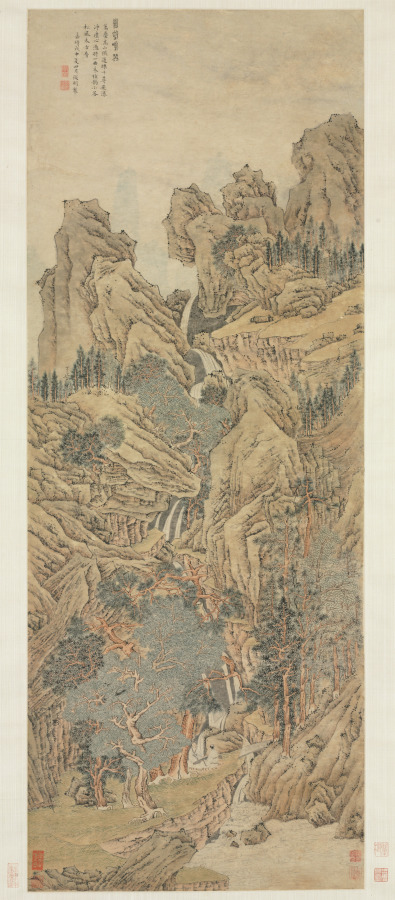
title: Playing the Qin in a Secluded Valley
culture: China, Ming dynasty (1368–1644)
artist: imitator of Wen Zhengming (Chinese, 1470–1559)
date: 1548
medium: hanging scroll; ink and light color on paper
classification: Painting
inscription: 幽壑鳴琴。 萬疊高山供道眼，千尋飛瀑淨塵心。 憑將一曲朱絃琴，小答松風太古音。 嘉慶戊申夏四月徵明製 [印] 徵明; 徵仲父印 [右下方] 悟言室印; 衡山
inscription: 4 additional seals: 3 of Cheng Qi 程琦 (1911–1988); 1 unidentified.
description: The poem inscribed in this painting reads: "Ten thousand layered lofty mountains are presented to the cultivated eye, A thousand feet of cascading falls cleanse the dusty heart. May the harmonies of my red-stringed tune Be the humble answer to the pine wind's ancient song." Different versions of this painting exist. Scholars have suggested that the solid renderings of the rock masses and the volumetric mountain configurations as seen here appear more characteristic of Lu Zhi 陸治 (1496–1576), Wen Zhengming's pupil.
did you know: In paintings, Chinese literati often play the instrument in a landscape setting, as the sound of the qin symbolizes harmony between man and nature.